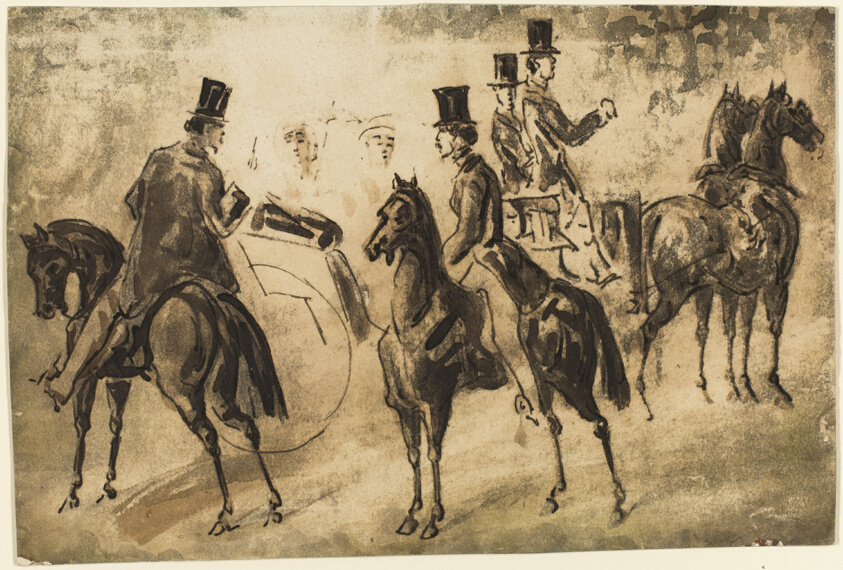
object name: Drawing and Watercolor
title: Riders and Equipage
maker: Constantin Guys (French, 1802-1892)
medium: Pen and brown ink, with brush and gray and brown wash, on ivory wove card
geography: France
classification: ink or chalk wash; drawings (visual works); prints and drawing